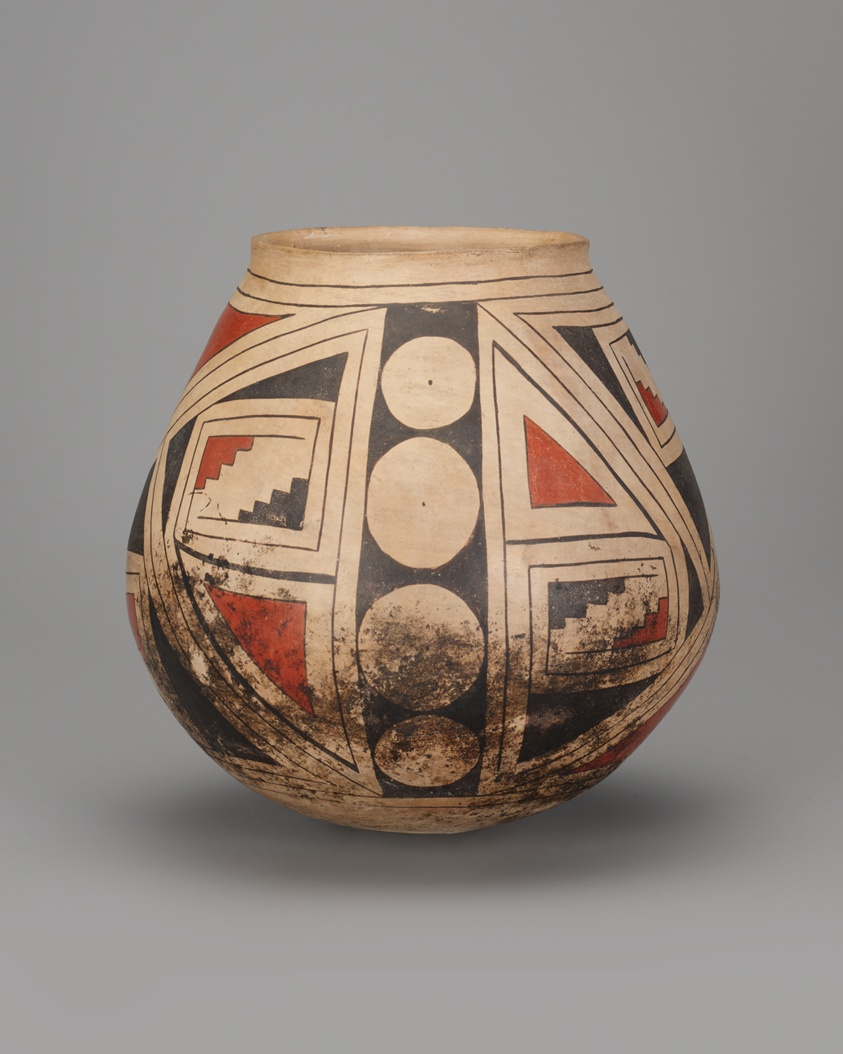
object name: Vessel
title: Ramos Polychrome vessel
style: casas grandes, americas, Arts of the Americas, native american, native north american, southwest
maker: Ceramist unknown (Casas Grandes); New Mexico, United States, or Chihuahua, Mexico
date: 1280–1450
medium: Ceramic and pigment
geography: New Mexico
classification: vessel; art of the americas; ceramics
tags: abstraction